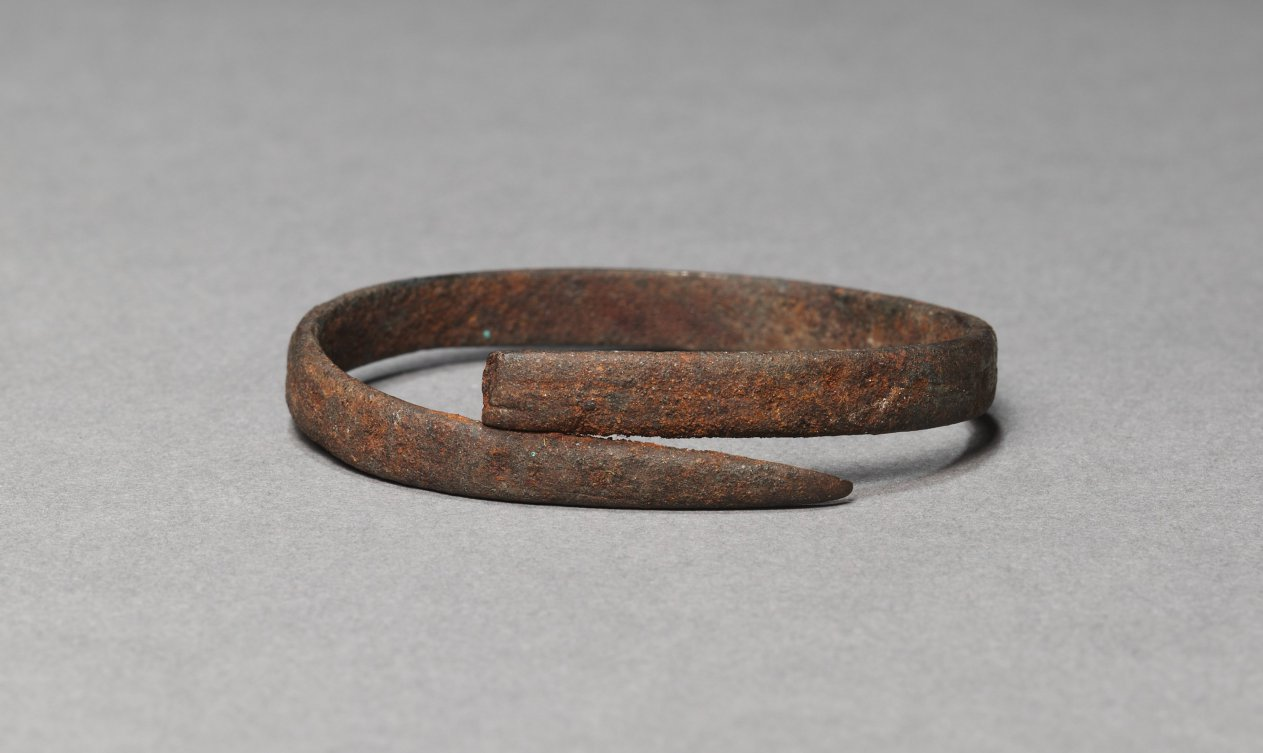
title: Bracelet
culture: Egypt, Greco-Roman period (332 BCE–395 CE), Roman empire (30 BCE–395 CE)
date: 200–400 CE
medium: iron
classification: Jewelry